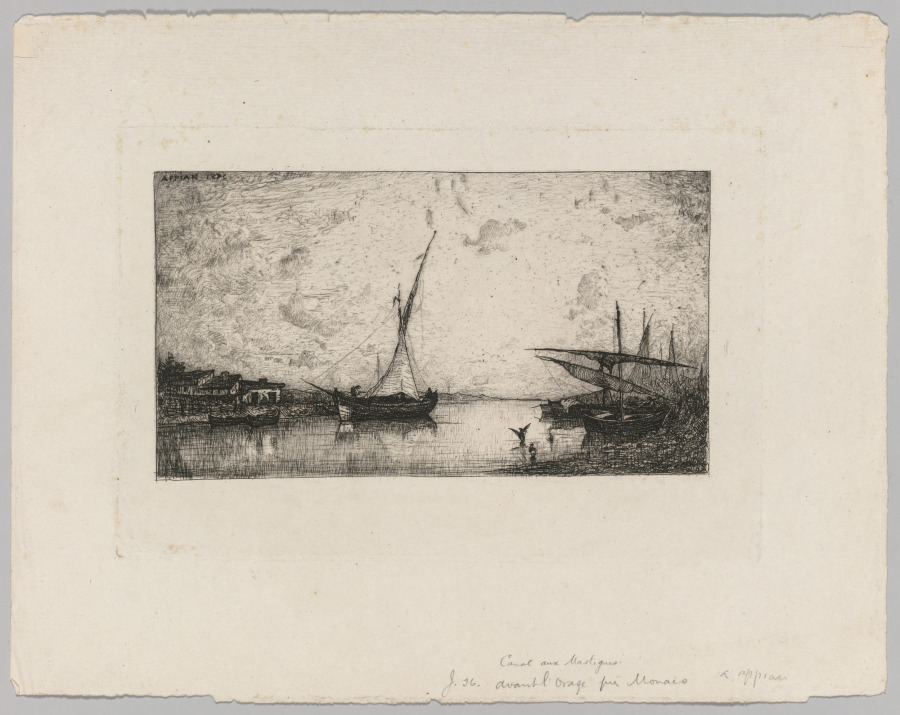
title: Canal aux Martigues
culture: France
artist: Adolphe Appian (French, 1818–1898)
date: 1872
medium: etching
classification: Print